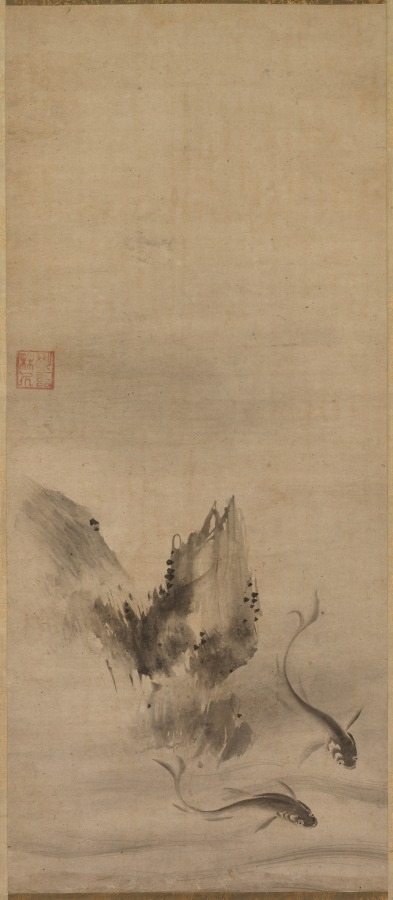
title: Fish and Rock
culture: Japan, Momoyama period (1573–1615)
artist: Rinkyo (Japanese)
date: 1573–1615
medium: one of a pair of hanging scrolls; ink on paper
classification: Painting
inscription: artist's seal at mid-left edge of painting.